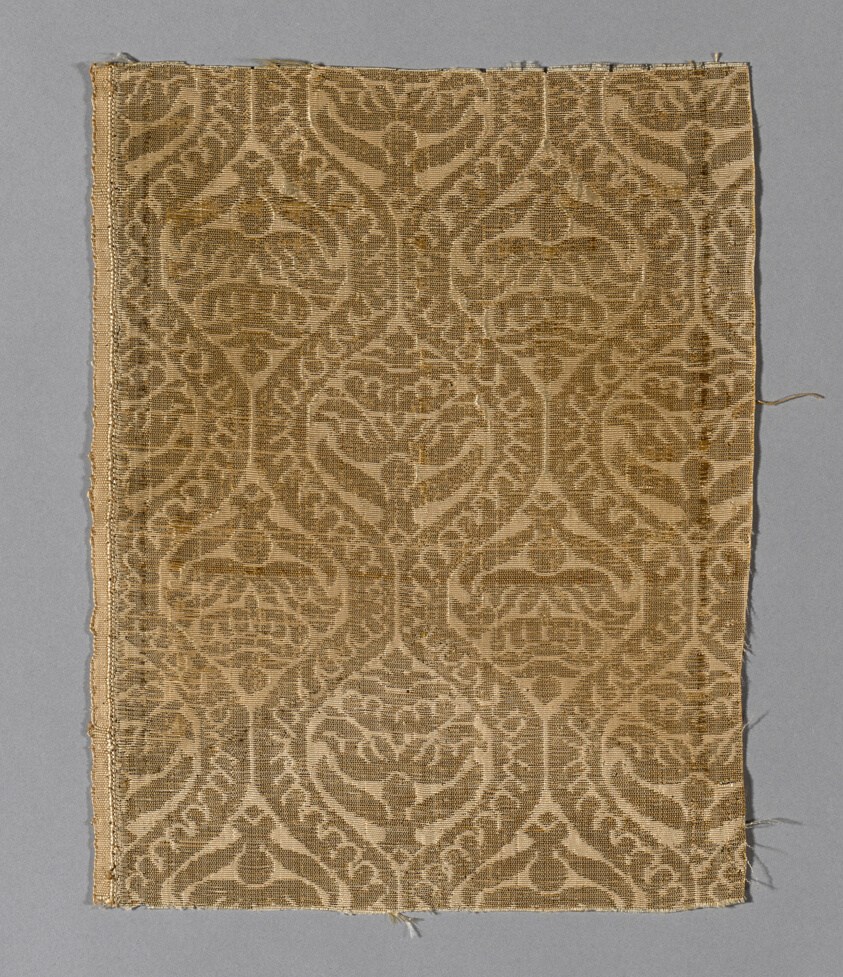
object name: Textile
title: Fragment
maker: Spain or Italy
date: 1600/1650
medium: Silk, plain compound cloth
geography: Spain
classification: textile; weaving